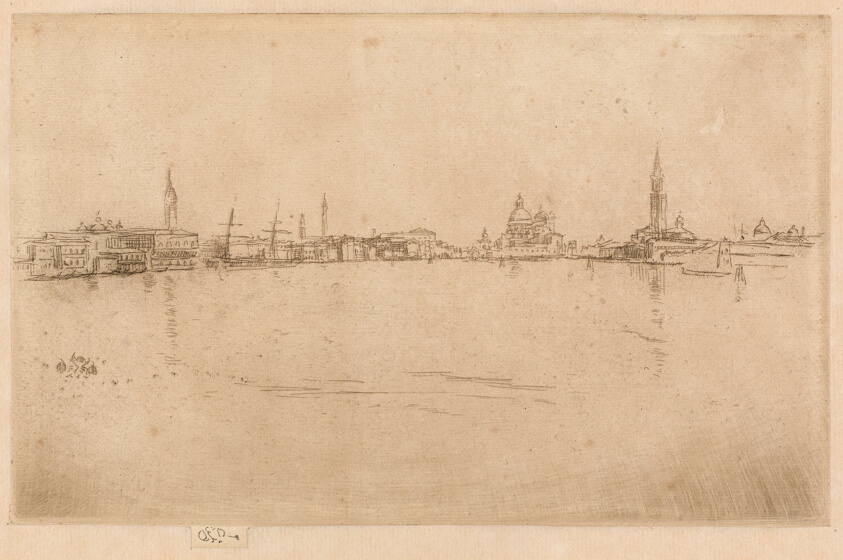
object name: Print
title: Salute Dawn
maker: James McNeill Whistler (American, 1834-1903)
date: 1879/80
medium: Etching and drypoint in dark brown on cream laid paper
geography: United States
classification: etching; paper; print; prints and drawing; drypoint